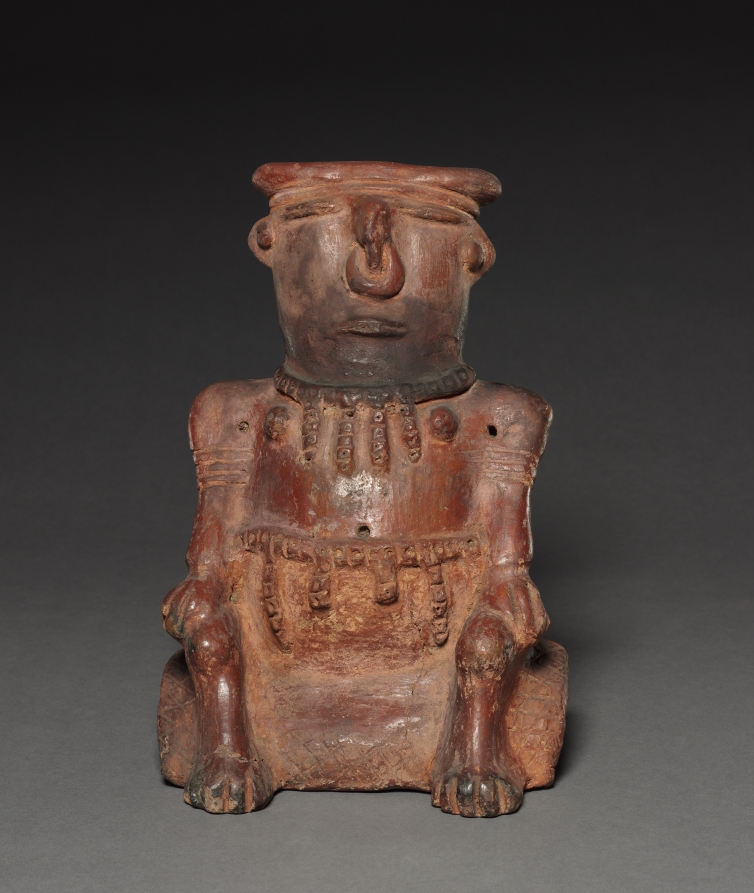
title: Seated Figure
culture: Colombia, 19th-20th century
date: before 1921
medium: red ware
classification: Ceramic